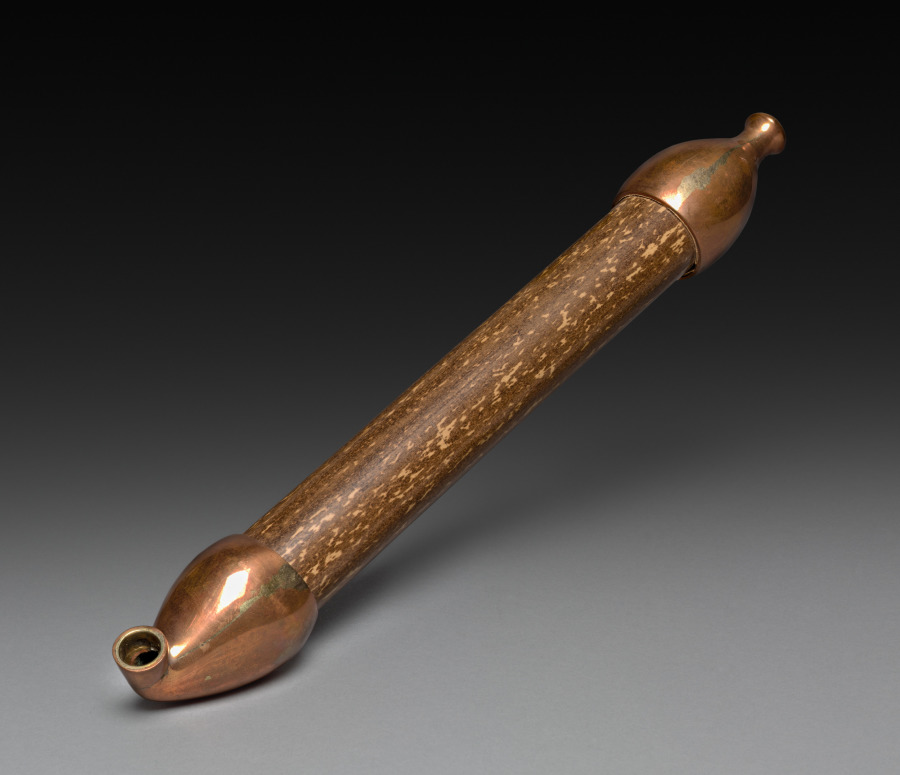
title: Tobacco Pipe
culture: Japan, Edo period (1615–1868)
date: early to mid-1800s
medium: bamboo and copper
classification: Miscellaneous